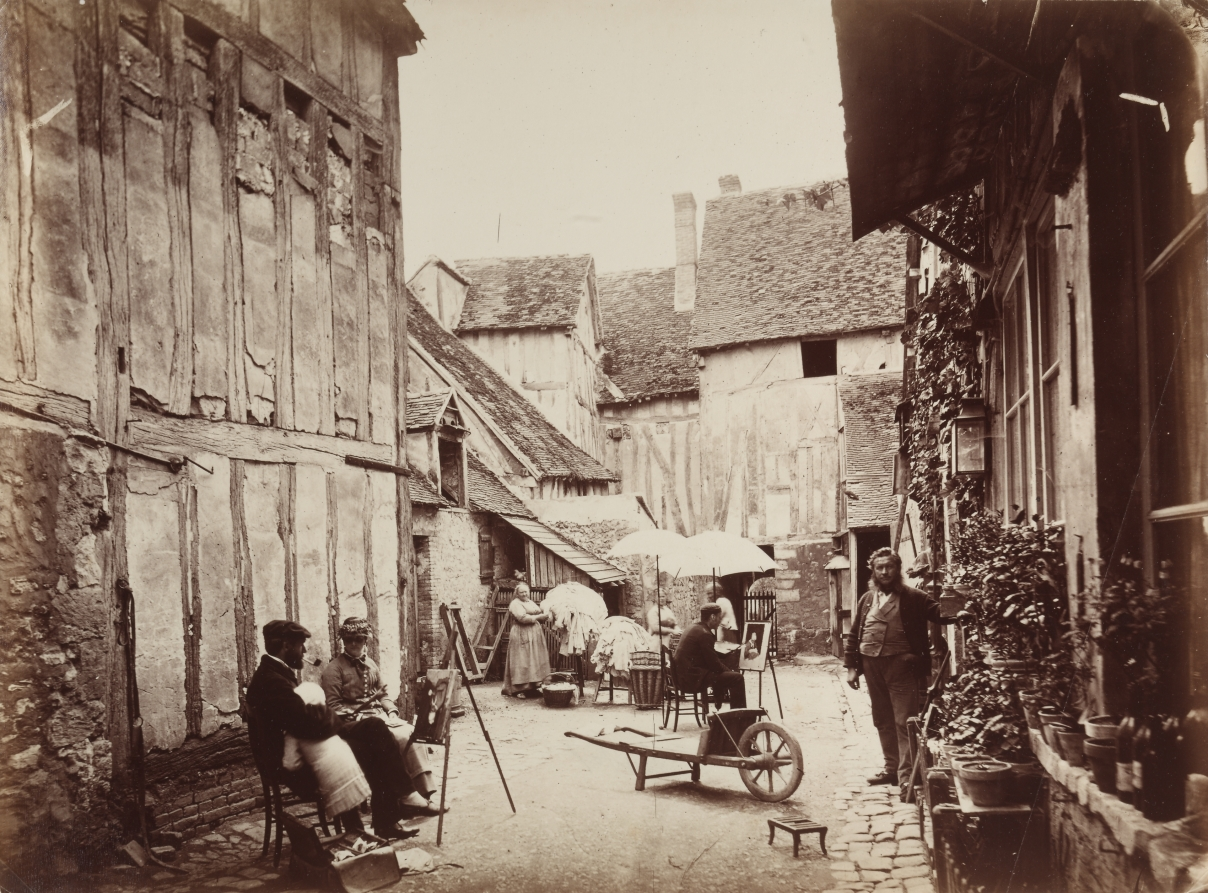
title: Courtyard with Painters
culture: France(?), 19th century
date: late 1860s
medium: albumen print from wet collodion negative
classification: Photograph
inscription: in pencil on reverse: Les Andeys (?) Cour & hotel, G713 and 695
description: This photographer inventively expanded the medium to create a rare example of both early genre (everyday life) photography and documentation of artists at work. The collodion negative captured a wealth of detail. The French village courtyard bustles with activity-the artist in the foreground hugs a squirming child and chats with his wife; a group of peasant women in the background heave huge bundles of laundry about in carts and baskets; and an innkeeper poses proudly for the camera outside his ivy-covered establishment. The diagonals of the sloping roofs and the textures of tiles, wood, and stone enhance the composition's visual interest. A luminous glow, absorbed by open canvas umbrellas, pervades the center of the scene.